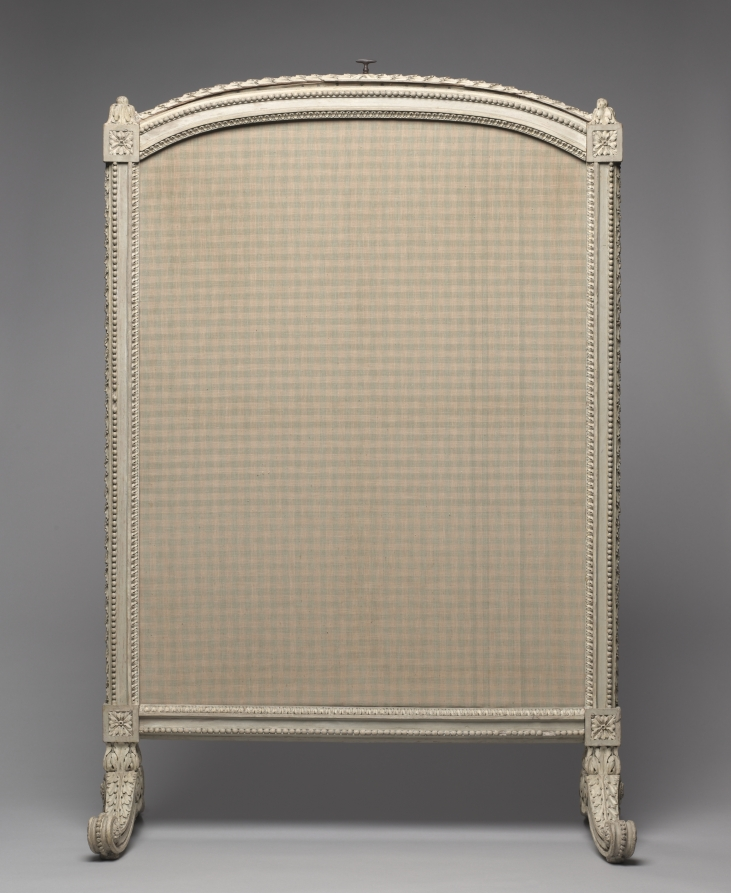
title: Fire Screen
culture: France, Paris, style of Louis XVI, 18th century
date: c. 1785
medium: carved and painted wood with tapestry panel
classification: Furniture and woodwork